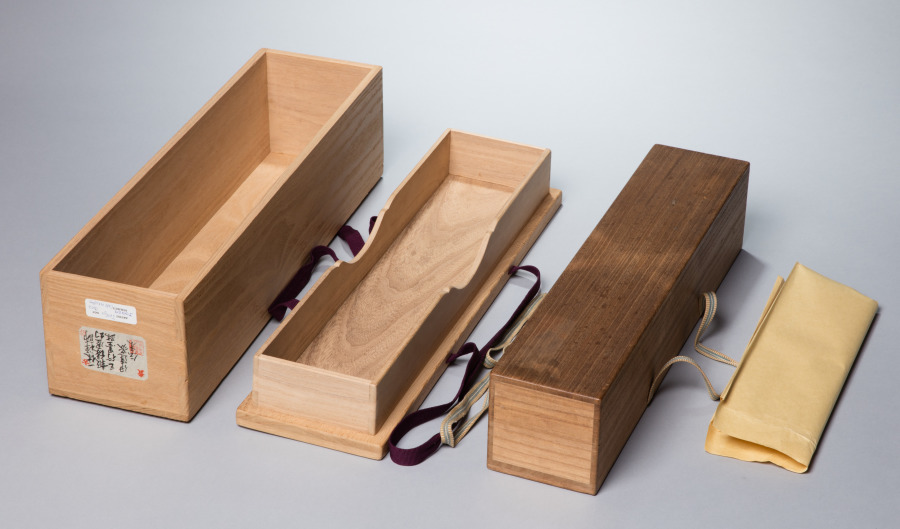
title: Reflections of Priest Foyen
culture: Japan, Muromachi period (1392–1573)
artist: Ikkyū Sōjun (Japanese, 1394–1481)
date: 1400s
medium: hanging scroll, ink on paper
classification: Painting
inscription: signed: "Kido nanasei son, Ikkyūshi Sōjun sho (Written by Ikkyū Sōjun, the seventh generation of Kido)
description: Left by his mother at a small Zen temple in Kyoto at the age of six, Ikkyu later drew on his early studies and experiences for his writings, which focused on his keen interest in the Chinese classics. Poetry in particular was a favorite subject and images from classical poetry or passages from favorite poems or commentaries frequently provided Ikkyu with the core ideas for his own work. A rare example of his calligraphy, this narrow scroll contains a verse in eight phrases, each comprising four characters. The whole verse is organized in three towering lines of brusque, emphatic calligraphy augmented by Ikkyu's signature-the two lines of running script in the lower left corner. The text refers to a passage included in the Chronicle of the Zen Sect that contains a cautionary reminder attributed to the legendary Chinese monk Foyen Qingyuan (1067-1120), long revered in Japan. The initial phrase begins: "Life is a mirage."